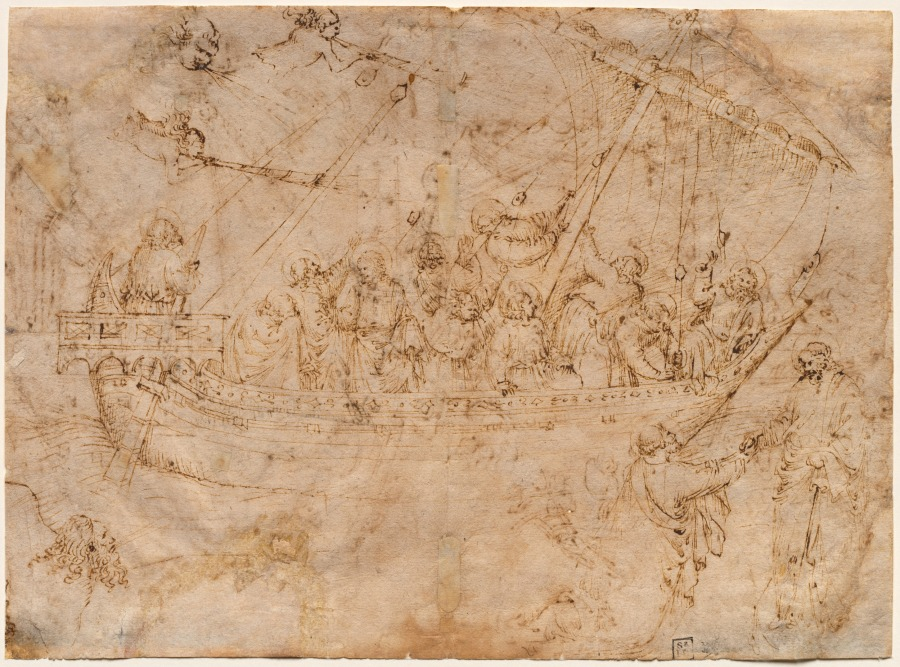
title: Navicella (recto); Two Drawings of Ships (verso)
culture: Italy, Arezzo, 15th century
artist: Parri Spinelli (Italian, 1387–c. 1453)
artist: after Giotto (Italian, 1266–1337)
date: c. 1410s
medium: pen and brown ink (iron gall)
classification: Drawing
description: Once attributed to the Italian painter Giotto (about 1267-1337), this drawing is the oldest sheet in the Cleveland museum's collection. We now know it to be a copy by Parri Spinelli after a mosaic Giotto designed for the portico of the church of Old St. Peter's in Rome.